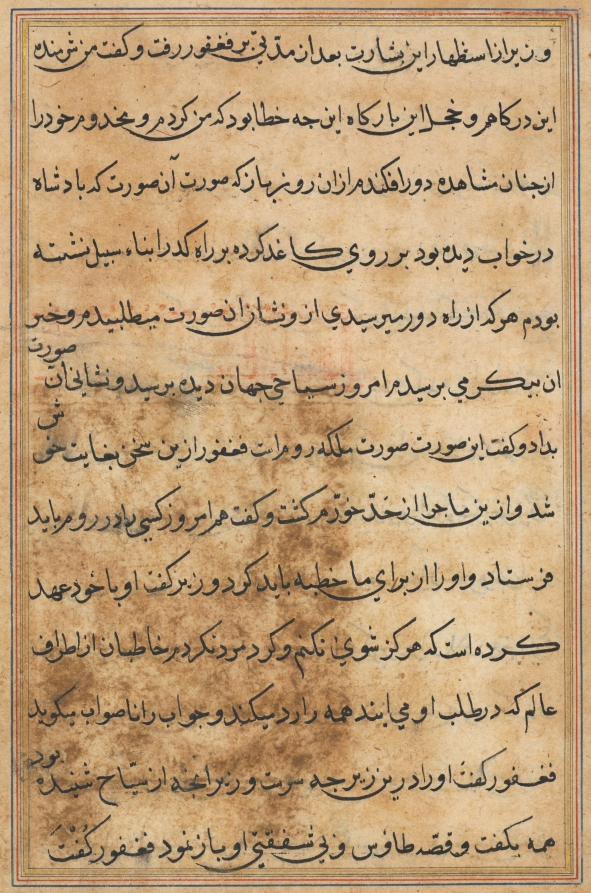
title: Page from Tales of a Parrot (Tuti-nama): text page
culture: Mughal India, court of Akbar (reigned 1556–1605)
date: c. 1560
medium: gum tempera, ink, and gold on paper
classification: Painting